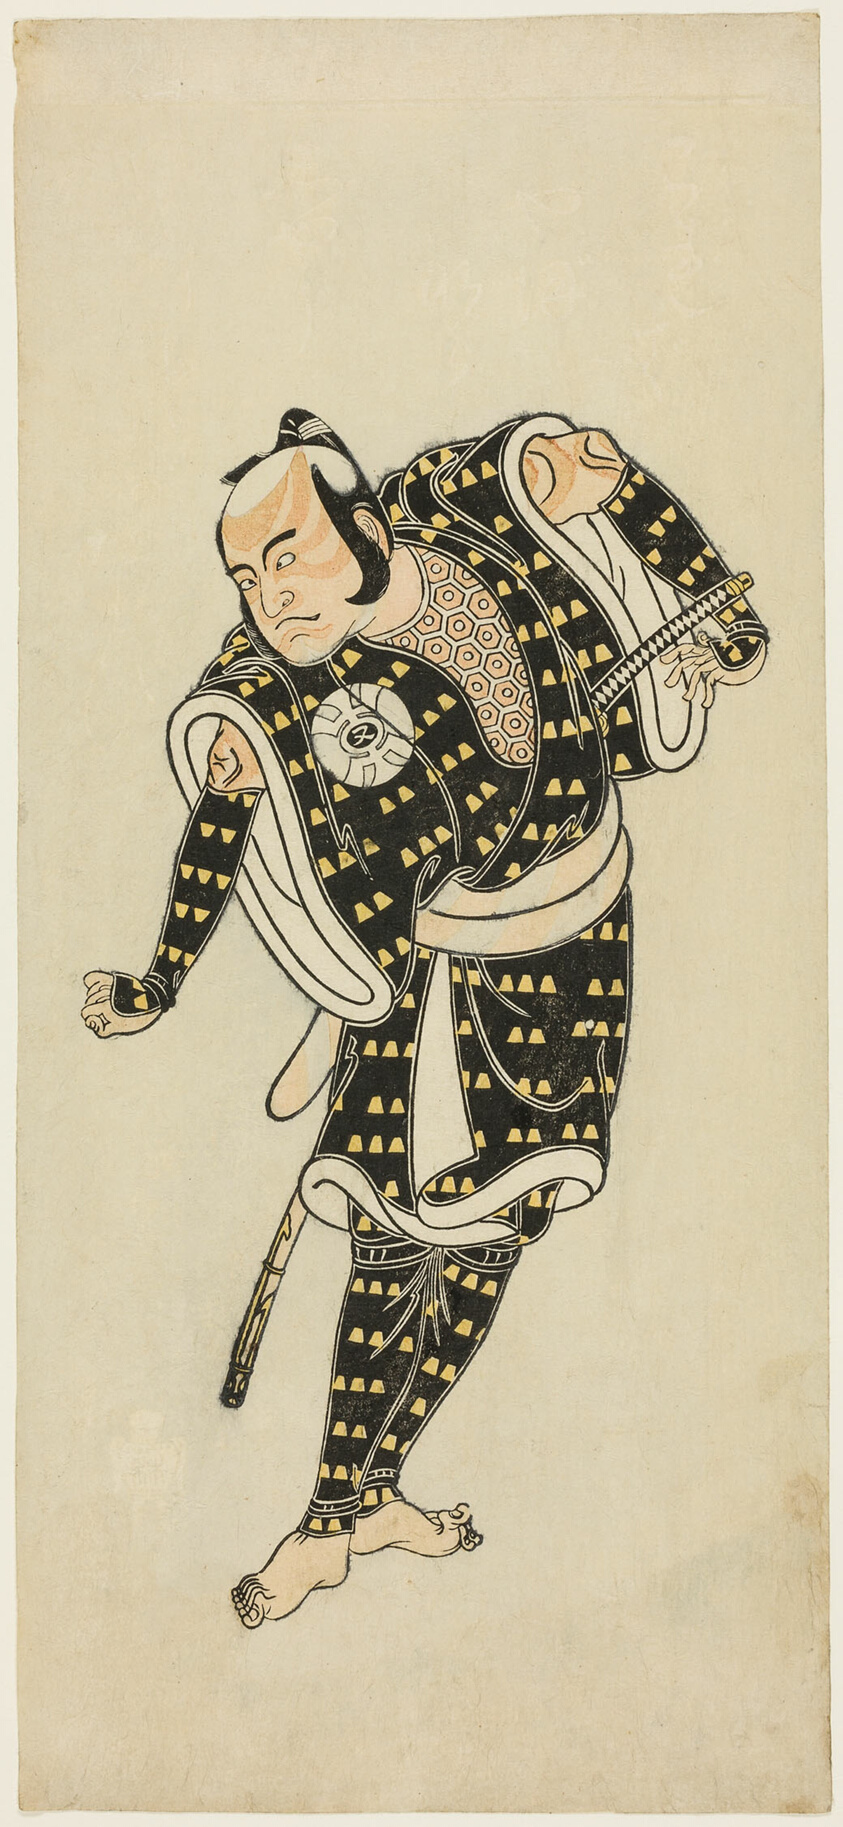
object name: Print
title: Actor Bandô Matatarô IV as Gempachibyôe in “Snowflakes: Plum Blossoms Kaomise” (“Mutsu no hana ume no kaomise”)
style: Japanese (culture or style)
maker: Katsukawa Shunshô 勝川 春章; Japanese, 1726-1792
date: About 1769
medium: Color woodblock print; hosoban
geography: Japan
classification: woodblock print; print; asian art